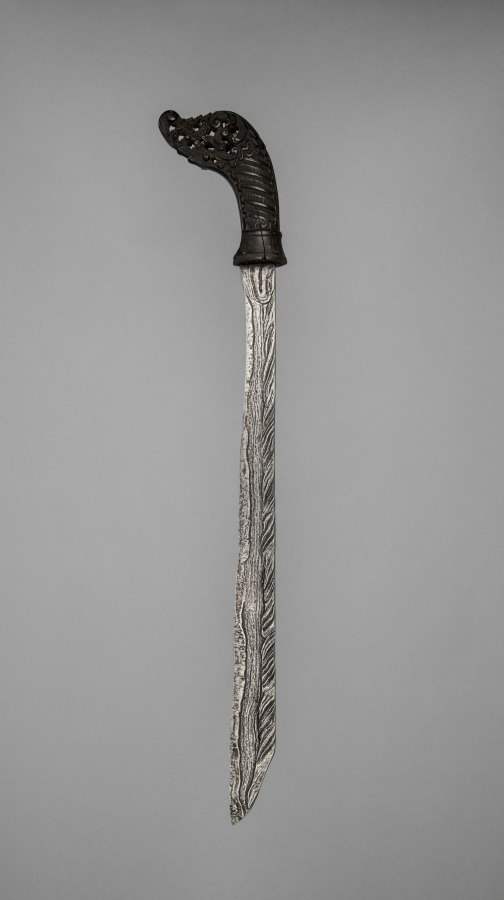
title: Sword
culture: Indonesia, Sulawesi (Celebes)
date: before 1916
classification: Arms and Armor